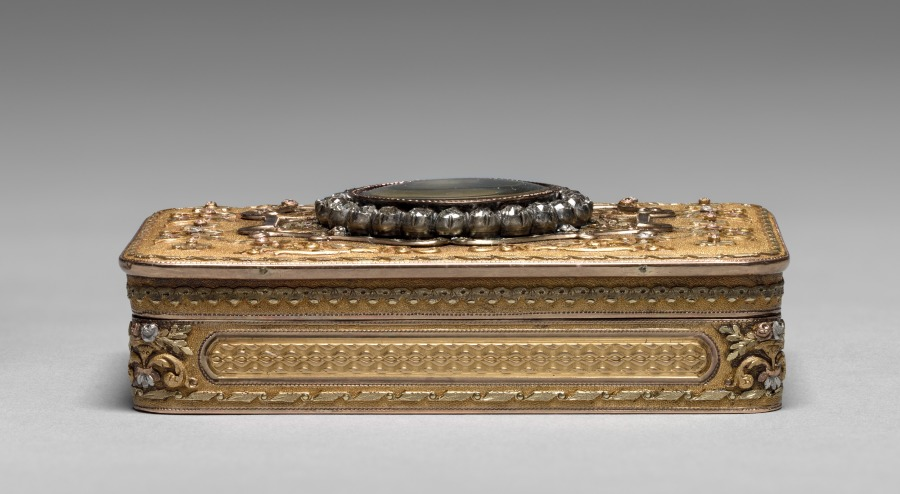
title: Portrait of a Man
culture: Switzerland, Neufchatel, mid-19th century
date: mid 1800s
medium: watercolor on ivory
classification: Miscellaneous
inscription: signed: "B."